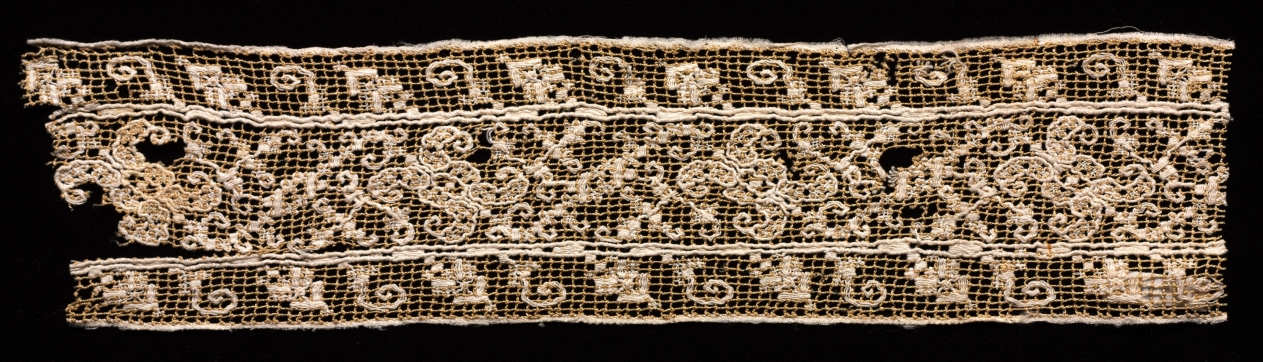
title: Fragment of a Band with Abstract Pattern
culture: Italy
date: 1500s–1600s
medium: Unbleached and bleached linen (est.): needle lace, filet/lacis (knotted ground and darned in one and two directions)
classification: Lace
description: The darker ground of unbleached linen allows the meandering pattern completed in the filet/lacis technique using bleached linen to prominently stand out.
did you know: This piece has a counterpart at the Metropolitan Museum of Art, New York (20.186.29).